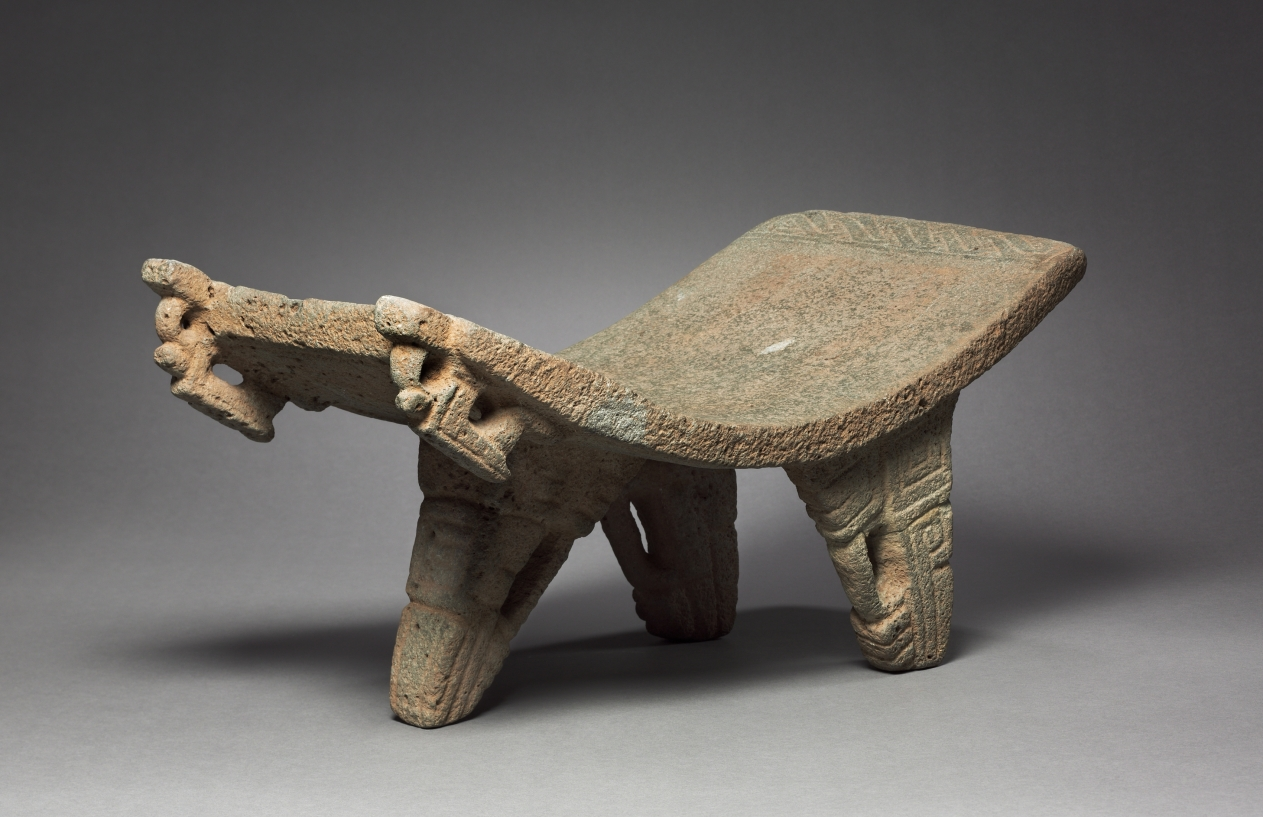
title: Metate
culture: Costa Rica, Guanacaste, northwest coast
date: 1200–1500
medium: gray volcanic stone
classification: Sculpture